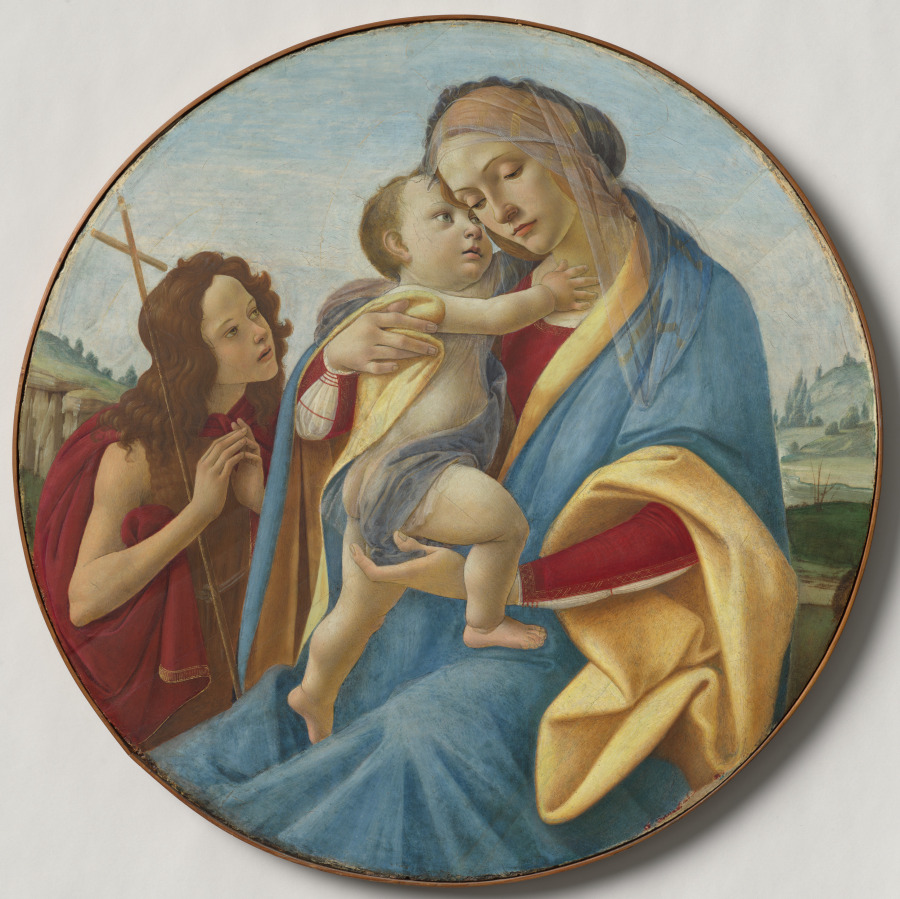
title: Virgin and Child with the Young Saint John the Baptist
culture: Italy, 15th century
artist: Sandro Botticelli (Italian, 1444/45–1510)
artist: and Workshop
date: c. 1490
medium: tempera and oil on wood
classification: Painting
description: The perfectly round form, called a tondo, became popular during the 1440s, especially in Florence. Made for domestic settings instead of churches, the circular format challenged the artist to create a harmonious, balanced composition within this more difficult shape. The attribution has been a matter of debate. Botticelli often collaborated with students, including Filippino Lippi, who would himself become a significant painter. Few specialists have doubted that Botticelli executed the central passages: the delicate modeling of the faces, the graceful poses, the figures’ profound interiority, and the diaphanous veil are the artist’s hallmarks. However, someone else in Botticelli’s studio probably painted Mary’s blue garment, also the most heavily restored part of the painting.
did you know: Saint John the Baptist, depicted here as a youth, and the Virgin were both patron saints of Florence.